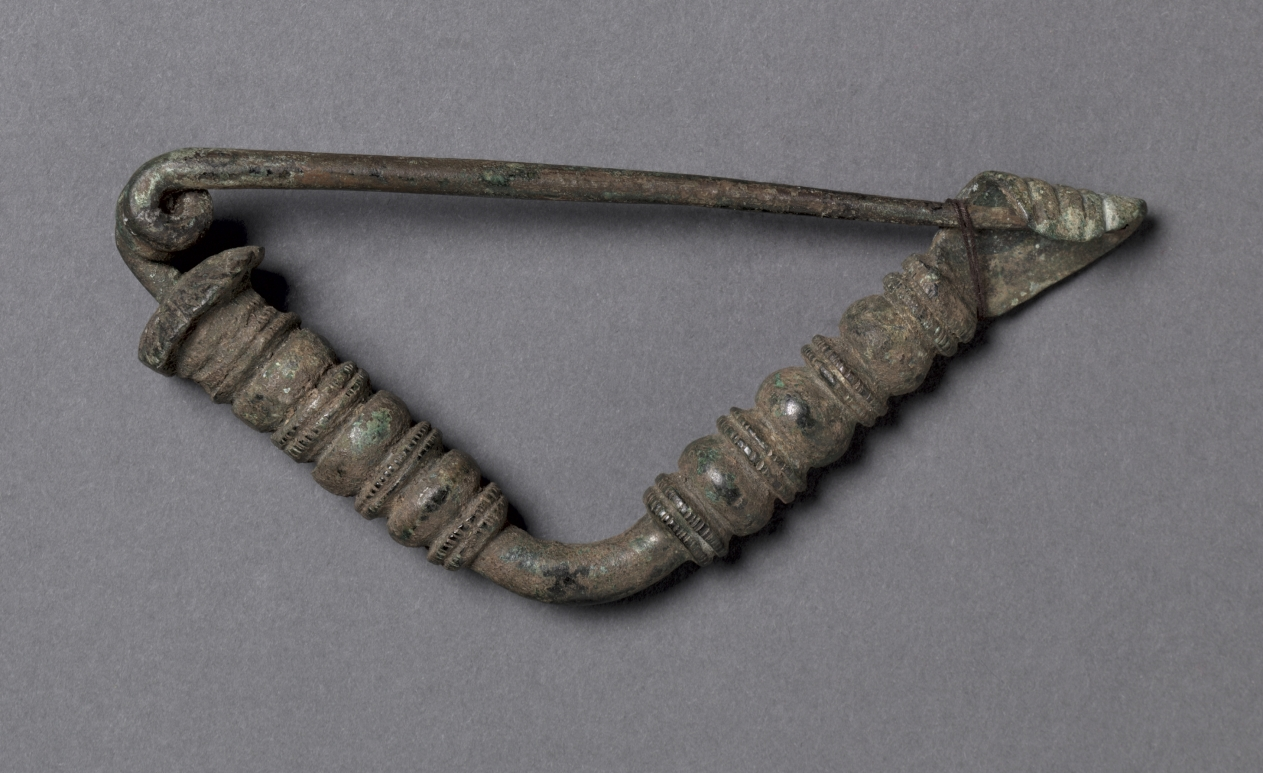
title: Fibula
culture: Syria(?)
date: c. 600 BCE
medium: bronze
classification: Jewelry